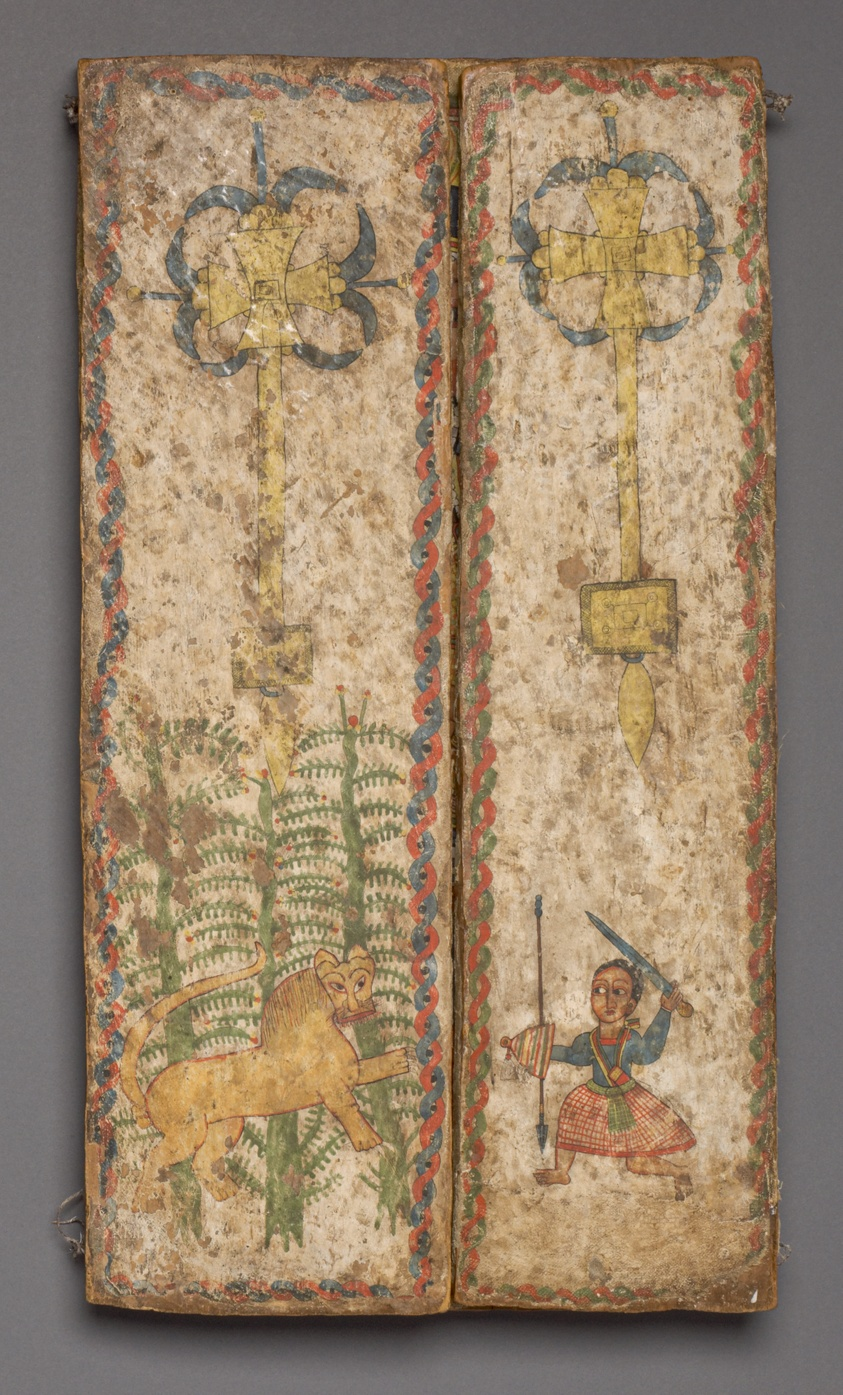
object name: Icon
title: Triptych Icon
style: gondar, Arts of Africa, ethiopia, african Art, Eastern and Southern Africa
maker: Central Ethiopia; Eastern and Southern Africa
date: Late 17th century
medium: Tempera on linen, mounted on wood and bound with cord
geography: Ethiopia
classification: triptych; arts of Africa; african art; ritual objects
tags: religion, biblical, Virgin and child/Madonna and child, Jesus, saints, procession, ritual, worship, Christian subjects